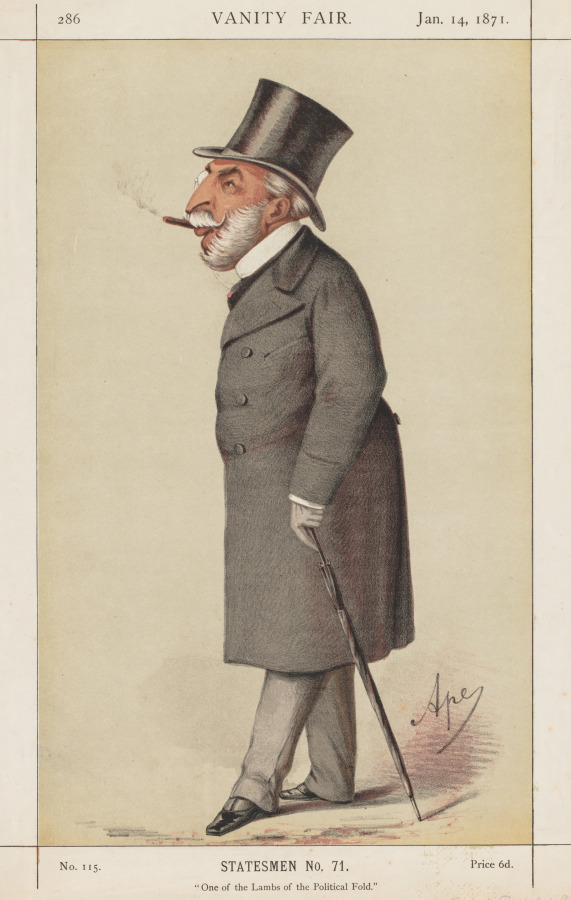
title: Vanity Fair: Statesman, No. 71 "One of the Lambs of the Political Fold"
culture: Italy, 19th century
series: published in Vanity Fair Jan. 14, 1871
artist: Carlo (Ape) Pellegrini (Italian, 1839–1889)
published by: Vanity Fair. (Boston: Frame Central, 1992.) p. 2, 14 Jan., 1871, S. No. 71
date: 1871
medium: color lithograph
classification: Print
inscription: Lower right, in graphite: Count Rudolph Apponyi